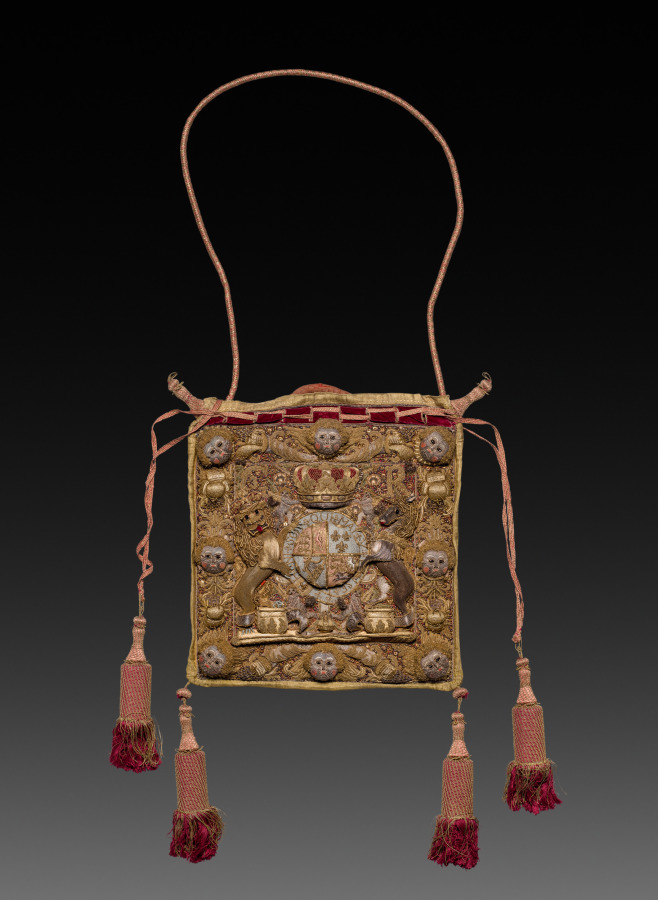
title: Lord Chancellor's Burse (Purse) with Royal Cypher and Coat of Arms of George III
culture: England, 18th century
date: 1700s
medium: red silk velvet, silk embroidery, goldwork, pearls, black beads, sequins, pendant tassels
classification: Velvet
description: A richly decorated burse (purse) to hold the monarch's Great Seal of the Realm has a traditional role in the opening of parliament. The safekeeping of the seal was the responsibility of the Keeper of the Great Seal, an office later incorporated into the role of Lord Chancellor. Because the Great Seal was attached to all major documents of state, it was the ultimate symbol of royal authority. The use of a special burse to hold the seal can be traced back to the end of the 13th century. By the end of the 16th century, the burse had evolved into the highly decorated, professional work of embroidery seen in this object. It includes the lion and unicorn surrounding the royal crest and is made from crimson velvet. Burses were replaced annually; it being a "perk" of office that the Lord Chancellor and Keeper of the Great Seal was allowed to keep the fragments of the old seal and accompanying burse. Portraits of Lord Chancellors, from the Tudor period onward, depict them with their burse. Cleveland’s collection includes one such portrait by American artist Gilbert Stuart (1755–1828) of Irish Lord Chancellor John FitzGibbon, 1st Earl of Clare (1748–1802) who was Lord Chancellor from 1789 to 1802. Baron FitzGibbon’s portrait (1919.910) is on view in gallery 204.